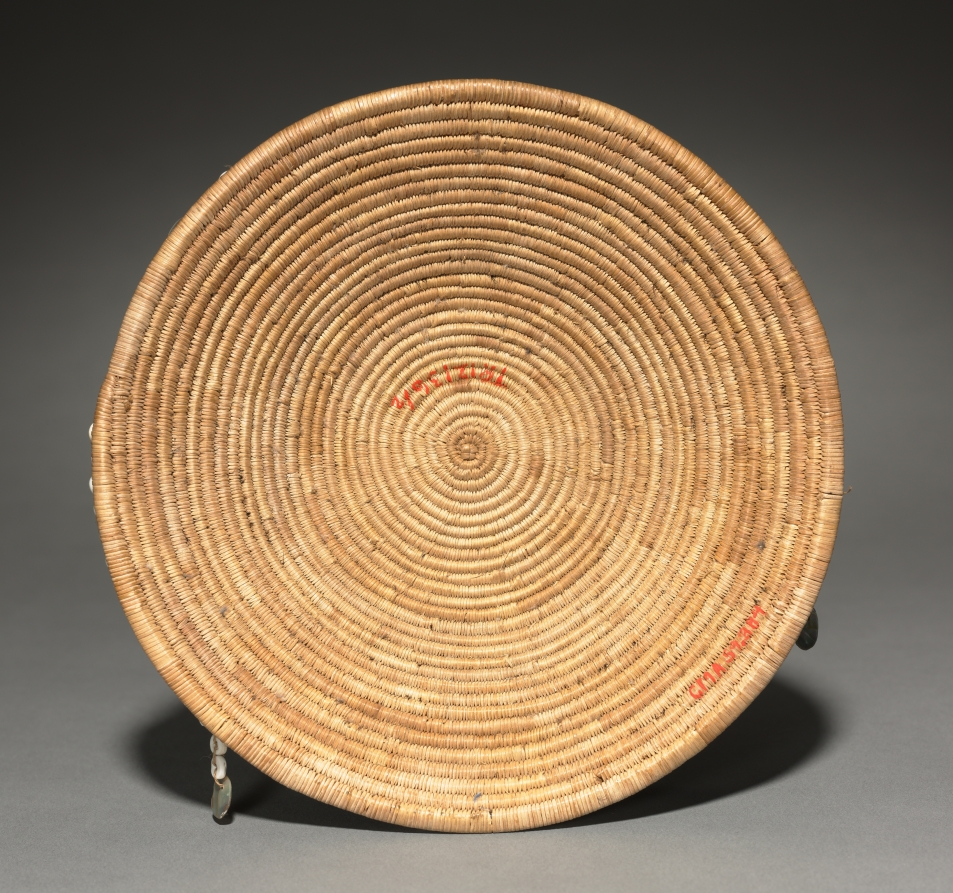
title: Gift Bowl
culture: California, Pomo, Late 19th- Early 20th century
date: c. 1905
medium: Sedge with mallard, meadowlark, and quail feathers, and shells; coiled (3 rods)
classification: Basketry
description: Although this basket probably was not made for native use, the feathered basket is based on an older type that was exchanged among natives as a treasured gift on such occasions as ceremonies that marked the stages of life. The feathers and shell beads are symbols of prestige and wealth.